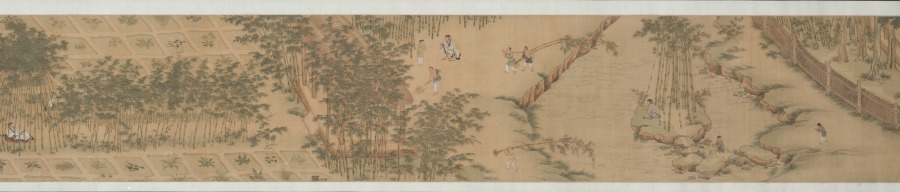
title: Garden for Solitary Enjoyment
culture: China, Ming dynasty (1368–1644)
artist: Qiu Ying (Chinese, 1494–1552)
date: 1515–52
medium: Handscroll; ink and light color on silk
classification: Painting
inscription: Accompanying text of an essay together with seven poems of Sima Guang (1019–1086) and one poem of Su Shi (1037–1101) written by Wen Zhengming (1470–1559) in 1558.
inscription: 2 colophons and 82 seals: 4 seals of Wen Zhengming 文徵明 (1470–1559); 59 seals of Xiang Yuanbian 項元汴 (1525–1590); 1 colophon, dated 1644, and 7 seals of Xiang Yukui 項禹揆 (c. late 1500s–1659); 1 colophon, dated 1880, and 2 seals of Weng Tonghe 翁同龢 (1830–1904); 2 seals of Ch'eng Chen-i (19th c.); 1 seal of Han Ch'ung (19th c.); 4 seals of Wan-go H. C. Weng 翁萬戈 (1918–2020); 3 seals unidentified.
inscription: Colophon by Xiang Yukui 項禹揆 (c. late 1500s–1659): The painting of The Garden for Self-enjoyment on the right by Shih-chou, Mr. Qiu [Qiu Ying] is in the style of Li Lung-mien. Its mood is peaceful, as if meeting the ancient gentlemen face to face among the brushes and silk; it lifts one above the sordid bustle of life. Formerly, my late father handed me this scroll which had only the painting without the written essay. I considered asking a good calligrapher to write the essay to add to it but was afraid that the quality of the writing would not match the painting. Several years later, I saw at a friend's house this essay and poems (of Ssu-ma Kuang] written by Hengshan [Wen Zhengming], once owned by my grandfather; so I spared no expense to obtain it. I rejoiced at this and said: "The divine swords are finally united. How things are pre-destined!" Now my friend Chang Kung-chao's technique for mounting [painting and calligraphy] is excellent. Therefore by daring to take them out and join them together, I can preserve this beautiful story of singular reunion. Xiang Yukui recorded at Hai-yeh-t'ang [hall] two days before New Year's Eve in the jiasheng year of the Chongzhen era [1644]. trans. LYSL/HK/WKH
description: Garden of Solitary Enjoyment refers to a site built in 1073 by the statesman Sima Guang (1019–1086) after he had retired to Luoyang, Henan province. Every spring, visitors would flock to his garden. Each of its seven structures references a historic figure. Sima wrote: I channel streams [like Du Mu], to water flowers [like Bai Juyi], or trim bamboo [like Wang Huizhi]. . . . I know of no joy between heaven and earth that could take its place. Qiu Ying’s painting, created after an 11th-century version of the same theme, must have appealed to garden owners of the Ming dynasty, since it became the template for numerous Suzhou workshop copies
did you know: Sima Guang completed his monumental survey of Chinese history, Zizhi tongjian, in the garden depicted in this painting.